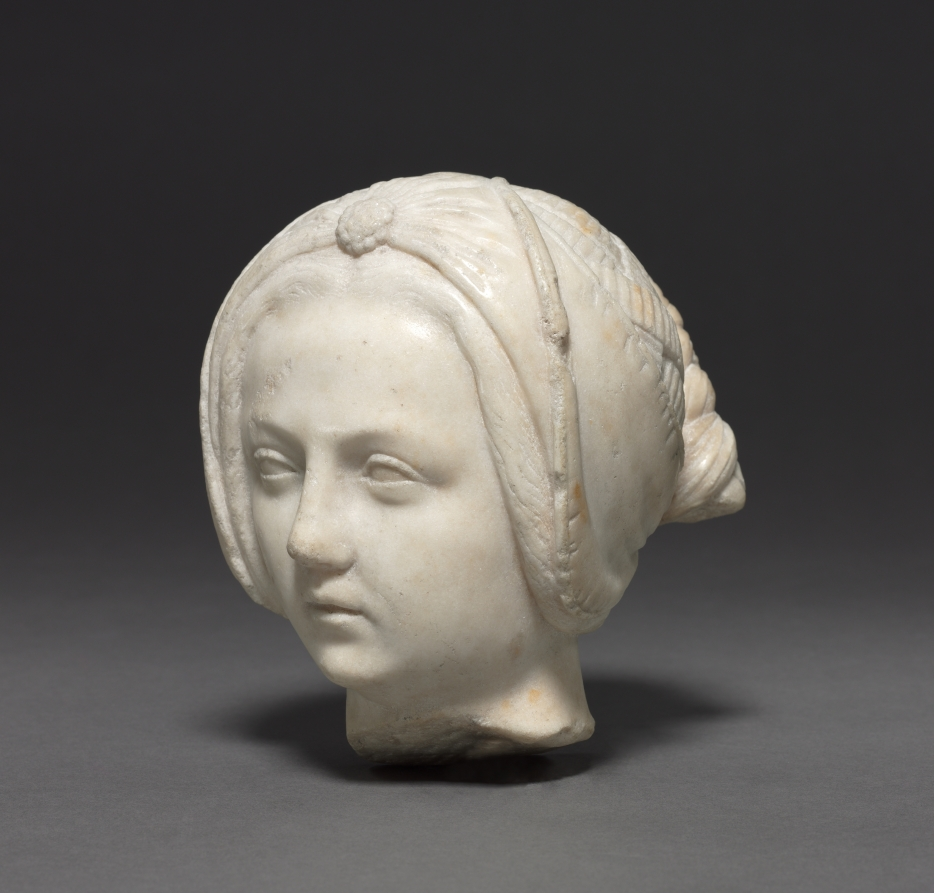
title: Head of a Woman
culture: France, 15th century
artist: circle of Michel Colombe (French, c. 1430–c. 1513)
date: c. 1500–1525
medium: marble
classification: Sculpture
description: The original context and function of these two marble heads are unknown. They are presumed to have been part of a relief sculpture from a château, perhaps in the Loire region, or else from a tomb sculpture. Their style is reminiscent of sculptures produced by Michel Colombe, a prominent sculptor active in the Loire Valley in the service of aristocratic and royal patrons, and may have been carved by a close follower or member of his workshop.